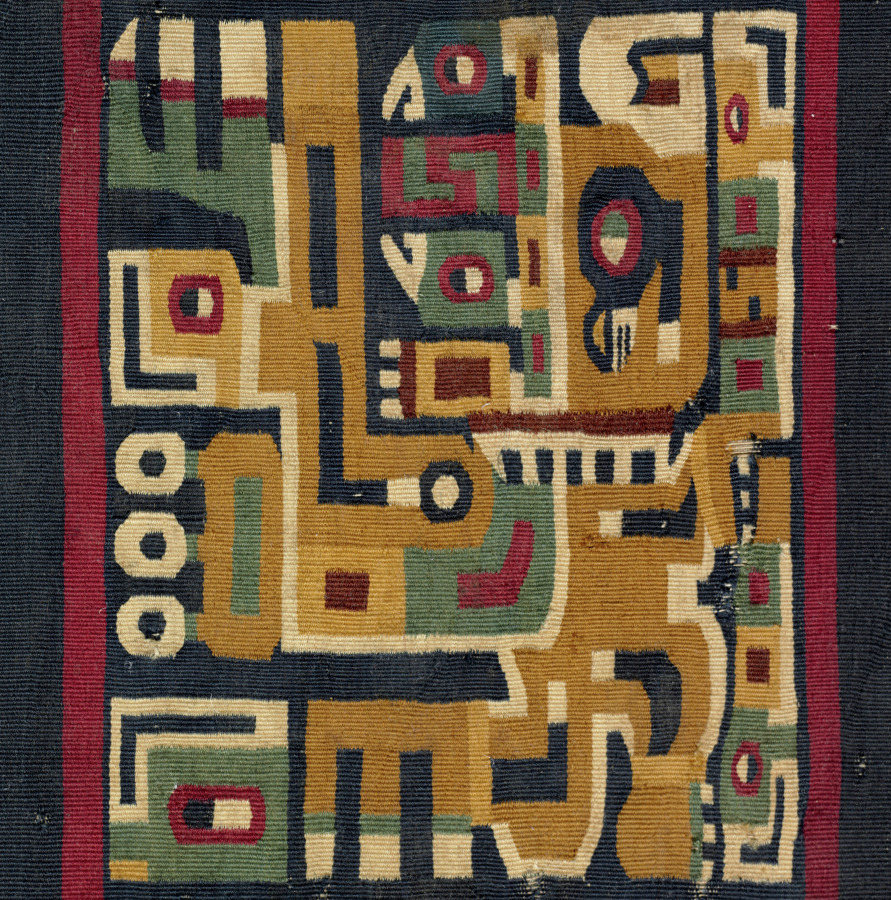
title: Tunic Fragments with Bird-Headed Creature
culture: Central Andes, Middle Horizon, Wari, 6th-11th century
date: 600–1000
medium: Camelid fiber, cotton; tapestry weave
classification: Textile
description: The bird-headed creature in profile that repeats in each of this tunic's design fields gazes upward, holds a staff of authority in front of its body, and wears an ornate headdress behind which a three-feathered wing can be seen. The extremely high technical quality of such tunics suggests that the Wari reserved bird imagery for their most exalted rulers. Here, the original incorporated more than twice as much yarn as the routine--some 19 miles, all handmade and much dyed an inky, dark blue, the most prestigious of Wari colors.